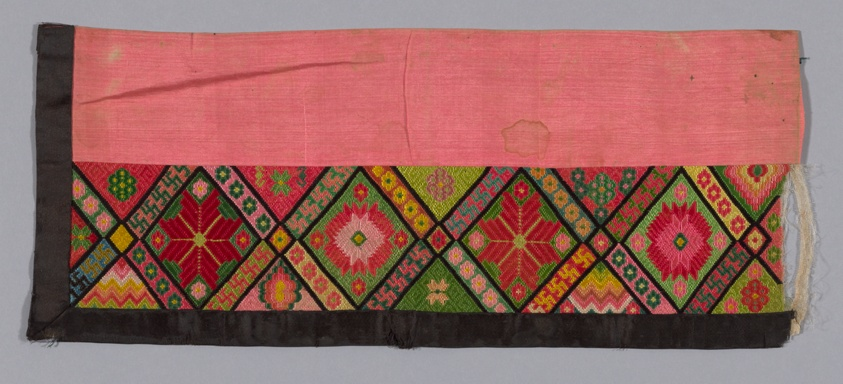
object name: Costume and Accessories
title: Trouser Band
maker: Han-Chinese (China)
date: Qing dynasty (1644–1911), 1875/1900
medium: Forty-four pairs and eight odd pieces of embroidered sleeve, ankle bands, etc. on gauze.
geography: China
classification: costume - embroidery; embroidery; costume